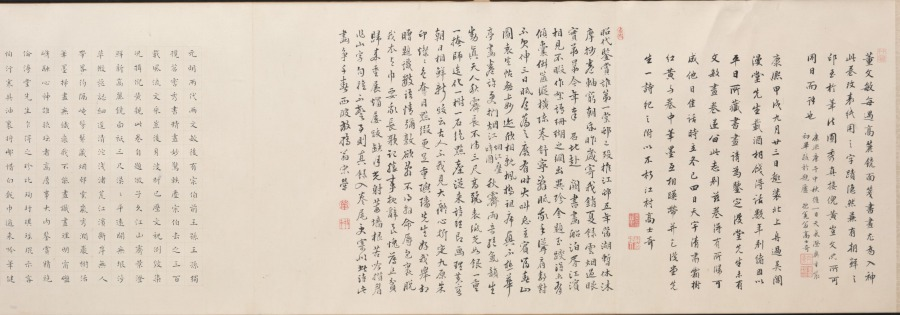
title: River and Mountains on a Clear Autumn Day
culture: China, Ming dynasty (1368–1644)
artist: Dong Qichang (Chinese, 1555–1636)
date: c. 1624–27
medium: Handscroll; ink on Korean paper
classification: Painting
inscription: 黃子久江山秋霽似此，當恨古人不見我也。思翁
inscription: 董文敏每遇高麗鏡面箋，書畫尤為入神。此卷改表紙用之，字跡隱然，兼有朝鮮之印。至於筆法圓秀，真接倪黃。豈文沈所可同日而語也。 康熙庚午中秋後一日，天氣澄爽，重裝初畢，跋於瓶廬。抱瓮翁高士奇。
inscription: Second inscription by Gao Shiqi 高士奇 (1645–1704): On the twenty-third day of the ninth month, the jiaxu year of the Kangxi era [1694], I packed my bags to head north. When my boat passed Wuchang [Suzhou], Mr. Mantang [Song Luo] brought wine to bid me farewell so that we could share our thoughts on our separation in the last few years. I showed him the paintings and calligraphy which I collected and asked his opinions. Since Mr. Mantang does not own any handscrolls by Wenmin [Dong Qichang], I leave this one for him in commemoration of our parting; thus the painting will have a worthy owner and our meeting will become a beautiful story in the future. It is the fourth day after the beginning of winter, with the sky clear and sober. Trees under frost have turned red and yellow, seemingly echoing the brush and ink in the painting. I also ask Mr. Mantang to inscribe a poem to commemorate our meeting so that it will survive forever.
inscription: 1 colophon and 4 seals of Song Luo 宋犖 (1634–1713): Who is the foremost art connoisseur of our dynasty?/ Tangcun [Liang Qingbiao, 1620–1691] is dead, so the title passes to Jiangcun [Gao Shiqi]./ Leaving office, you retired for five years in the Lake region./ Fondling handscrolls and hanging scrolls from morning to evening./ You sent me your collection catalogue Xiao Xia Lu last year;/ It is indeed the true equal of [Zhou Mi's] Yun Yan Guo Yan./ This year you returned to the capital by imperial order;/ Your boat with calligraphy and paintings anchored at the river bank in Suzhou./ When we met each other you did not waste any time for conversation by poured out immediately/ From your "coral net" extraordinary treasures./ You produced incomparable scrolls, with gold-inscribed labels and jade rollers,/ Pouring out from bags and trunks, they were spread in disarray./ Without a word, I rolled and unrolled until my fingers were numbed,/ We sat straight, facing each other quietly, and never felt tired./ For three days we forgot about sleeping and food./ And at times we shouted our joy out loud, forgetting who is host or guest./ Your Dwelling in the Fuchun Mountains and the Yuansheng manuscript/ These peerless works I myself examined with delight./ As an added pleasure to the farewell dinner under the Maple Bridge,/ You allowed me to hold again this handscroll by Dong Qichang--/ The Misty River and Piled Peaks [by Zhao Mengfu] and this Clear Autumn Day are two extraordinary masterpieces./ In showing such life and spirit with "qi yun." the artists were truly "men of heaven."/ The Clear Autumn Day is not even three feet long,/ Painted on tributary Korean paper, it shines like silver./ Every building up and every turn of the mountains imitates nature,/ Every tree and every rock is removed from the commonplace./ From the beginning, the theory of poetry is the theory of painting,/ Like the lotus and the morning sunshine, they complement and refresh each other./ The artist's inscription regrets that "the Old Masters cannot see my scroll."/ Huang Gongwang would have agreed in his grave./ The vermilion of the seals glitter and dazzles the eyes,/ These added accessories are as valuable as jade./ You are very kind to give it to me,/ The feelings expressed in your inscription are so sincere./ Wanting to refuse, but unable, I accept it to respect your wish,/ And taking off my gown and cap I wrapped it with care./ You asked me to write a long poem in commemoration of this beautiful occasion,/ I am too ashamed that my effort in response is so poor and inadequate./ Returning home, I unrolled it under candlelight, trying to write the colophon,/ The light of the waning moon shines at the foot of the mossy wall./ Earnestly humming and brows knit in deep thought, I try to compose;/ The verses are not outstanding, but the facts are real./ With this poem recorded at the end of the scroll, I mail it to you for approval,/ This poem and this painting shall outlast a thousand springs. (Translation by LYSL/HK/WKH)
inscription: 1 colophon and 2 seals of Shao Changheng 邵長蘅 (1637–1704); 2 inscriptions and 14 seals of the Qianlong 乾隆 emperor (r. 1736–95); 1 seal of the Jiaqing 嘉慶 emperor (r. 1796–1820); 3 seals of the Xuantong 宣統 emperor (r. 1908–11); 1 seal unidentified.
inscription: [印] 朝鮮國王之印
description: Dong Qichang had a tremendous impact on the artistic practices and historiography of later generations; his works and writings shaped literati aesthetics. Here, Dong places an abstract landscape composition diagonally across the picture plane, configured to recall earlier masters and simultaneously express his own personal style. Dong’s inscription claims, Huang Gongwang’s Autumn Day, looks like this. I truly regret the master has not seen my work. In fact, Dong Qichang may have had Dong Yuan’s Xiao and Xiang Rivers in mind, a work he owned and considered a key work in Chinese art history.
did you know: The painting has an imprint of a Korean seal that reads "Seal of the king of Joseon."